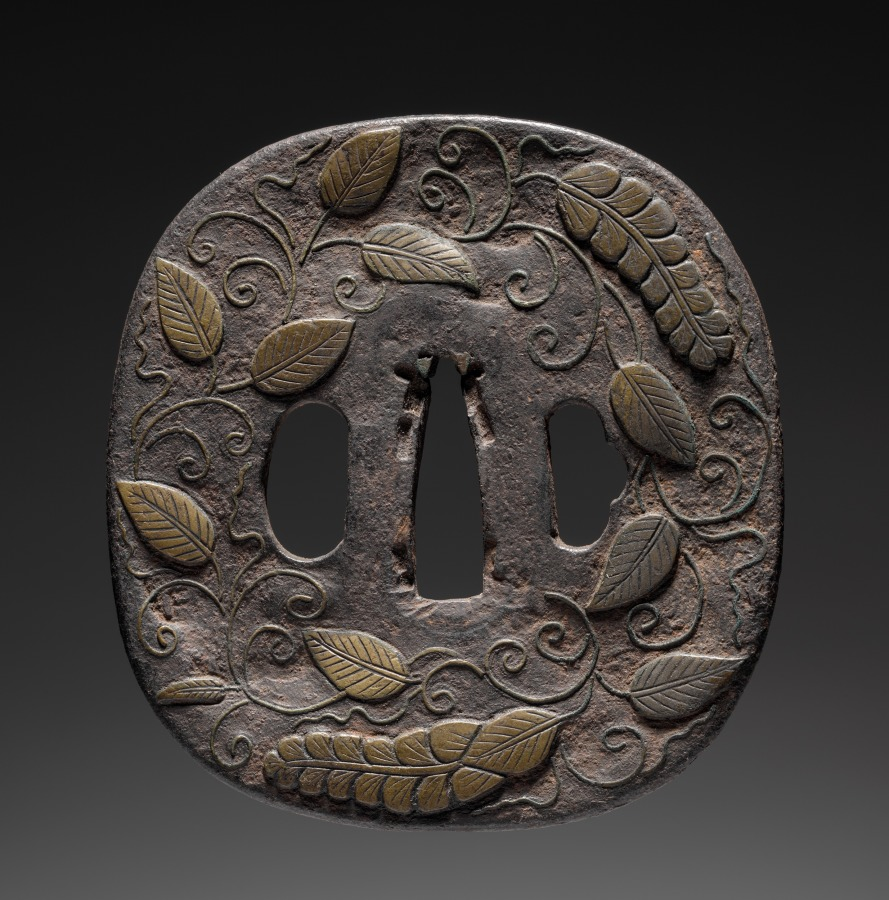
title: Sword Guard (Tsuba)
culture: Japan, possibly Edo period (1615-1868)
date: c. 1615–1868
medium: iron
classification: Arms and Armor